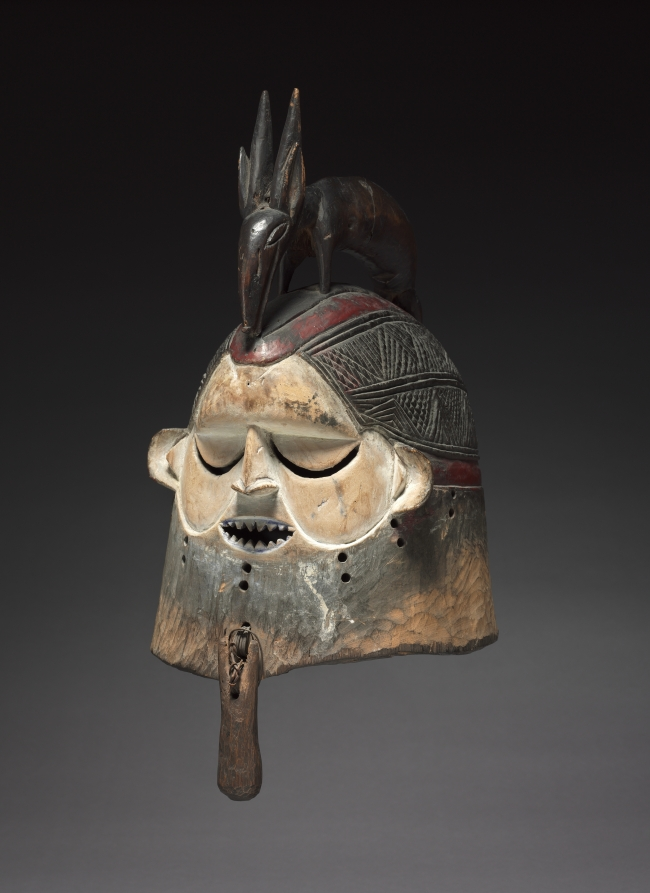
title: Mask (hemba)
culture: Africa, Central Africa, Democratic Republic of Congo, Suku-style carver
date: late 1800s–early 1900s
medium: Wood, reed, paint, and metal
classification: Mask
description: Suku helmet masks are often used in initiation ceremonies for young men in the society. Helmet masks such as this represent images of deceased elders in the society. They are to ensure successful hunting, help cure illnesses, and protect its wearer from evil. The animal shaped like a gazelle or antelope is typically associated with folktales, proverbs, and personal hunting exploits.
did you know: Suku helmet masks are often used in initiation ceremonies for young men in the society.